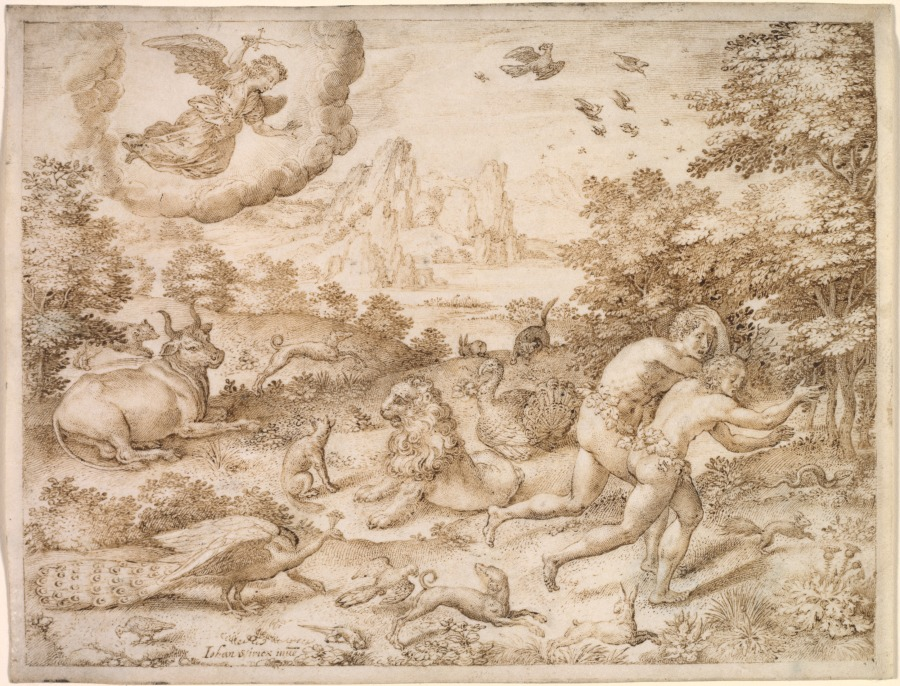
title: The Expulsion from Paradise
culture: Flanders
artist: Jan Wierix (Flemish, c. 1549–after 1615)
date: c. 1606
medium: Pen and brown ink on parchment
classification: Drawing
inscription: signed, lower left, in brown ink: Iohan wiricx inue [abbreviation line over "u" and "e"]; verso, lower left, in graphite: No ["o" with double underlines]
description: Originally this exquisite sheet belonged to a series of 21 drawings by the Antwerp artist Jan Wierix illustrating the creation and early history of man as recounted in Genesis. In this scene, an angel casts Adam and Eve out of paradise for their transgressions. Precious in its delicate pen strokes and careful detail, the drawing describes Eden as a microcosm populated by an array of animals whose tranquility is in the midst of being interrupted by human actions. Pen and ink drawings on vellum such as this were prized by collectors, who valued them as miniature paintings to be displayed in albums and sometimes framed on the wall.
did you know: This artist's version of the Garden of Eden includes a turkey, a bird that was unknown in Europe until the 16th century, when it was imported from the Americas.